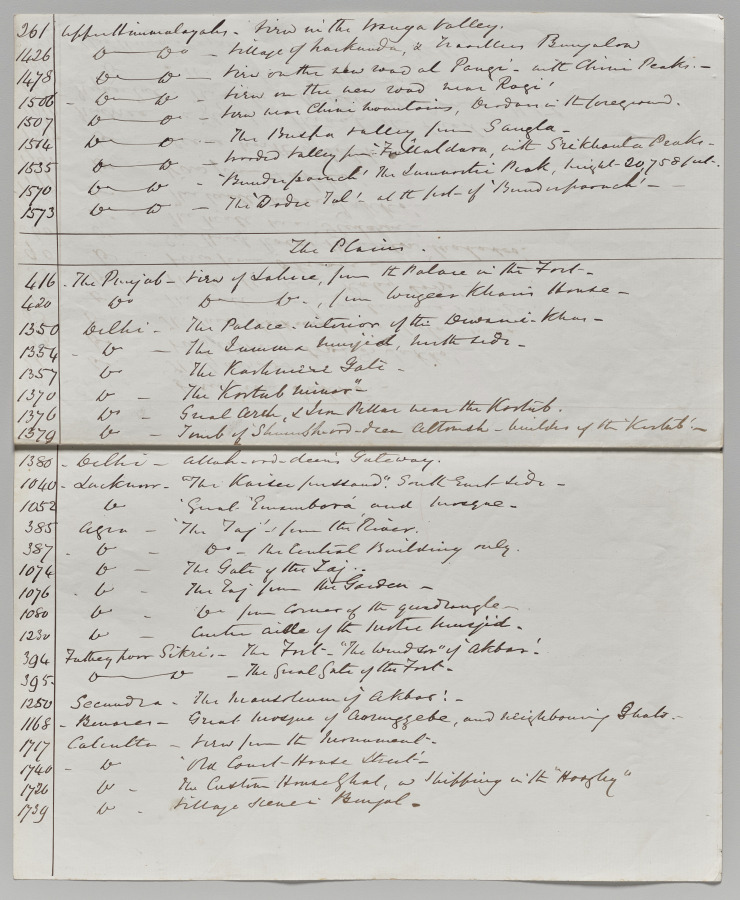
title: Photographs of Northern India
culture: England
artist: Samuel Bourne (British, 1834–1912)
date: 1863–70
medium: Album of 50 albumen prints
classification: Bound Volume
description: The 50 images in this album, all taken in the 1860s, move from the hill towns of the Himalayas down to cities including Lahore (now in Pakistan), Delhi, Lucknow, Agra, Benares (now Varansi), and Calcutta (now Kolkata). Architectural studies of major monuments offer valuable historical records of what sites such as the Taj Mahal and the imperial mosque of the Mughal emperors in Delhi looked like before twentieth-century restorations.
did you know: Samuel Bourne, the author of most the images in this album, was a banker in England before he moved to India to become a professional photographer.